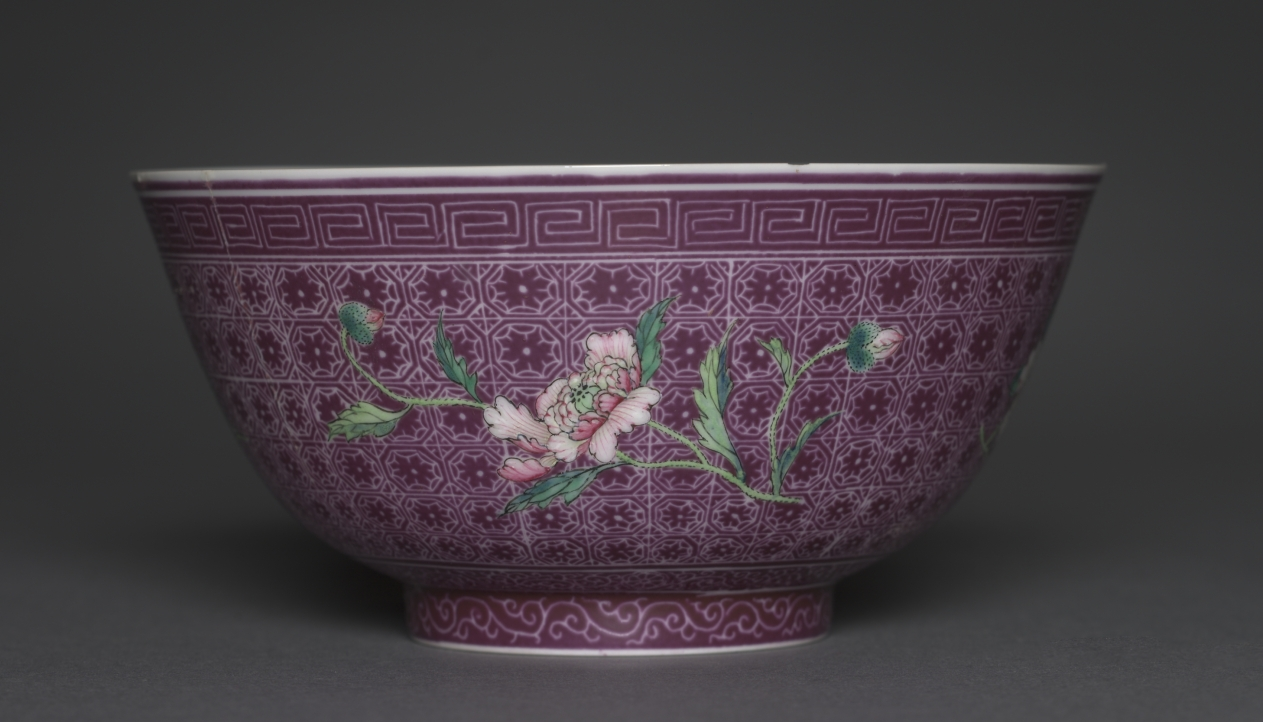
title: Bowl with Peony Sprays on Diaper Ground (exterior); Chrysanthemum Sprays (interior)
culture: China, Jiangxi Province, Jingdezhen, Qing dynasty (1644–1911), Qianlong mark and reign (1736–95)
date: 1736–95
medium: porcelain with famille rose overglaze enamel decoration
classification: Ceramic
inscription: 乾隆年製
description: The production of extraordinarily refined Qing imperial wares such as these could have involved the transportation of undecorated, plain porcelains from the imperial kilns in Jingdezhen, Jiangxi province, to the palace workshops in Beijing, where court painters applied the polychrome enamel decoration. The Qianlong reign mark on the base of the bowl is written with blue enamel over the transparent glaze.